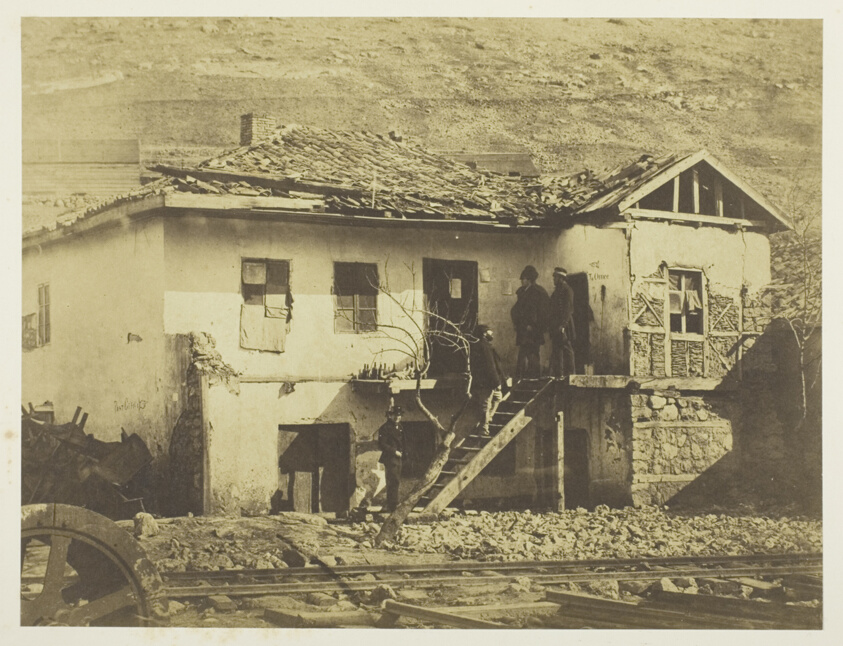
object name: Photograph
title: The Old Post Office, Balaklava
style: 19th century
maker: Roger Fenton (English, 1819–1869)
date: 1855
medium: Salted paper print, plate 6 from the album "Photographs Taken in the Crimea" (1856)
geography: England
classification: salted paper print; photographic process; photography; photograph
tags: Collected by Hugh Edwards, Crimea 1856